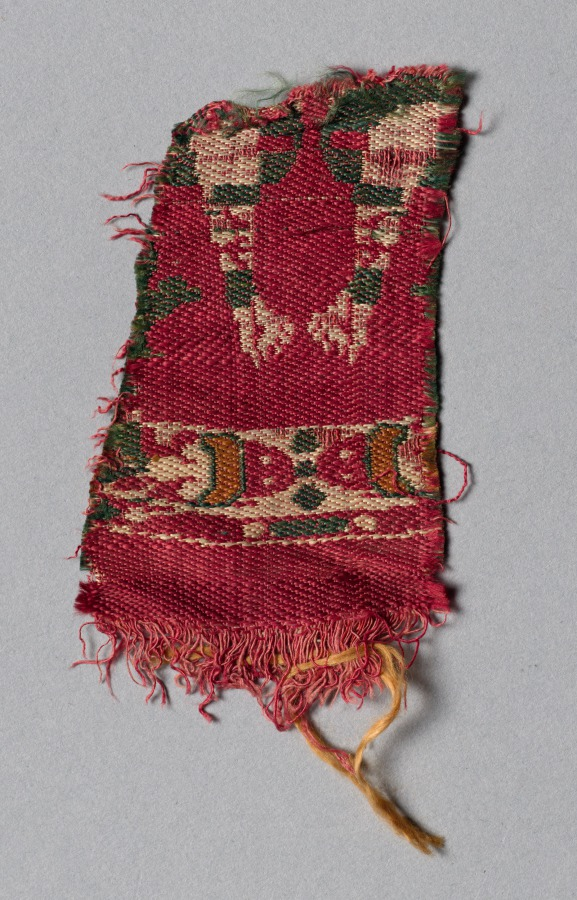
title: Silk Fragment: David (or Samson) killing the Lion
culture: Byzantium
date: 600s–700s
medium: compound twill weave, silk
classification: Textile